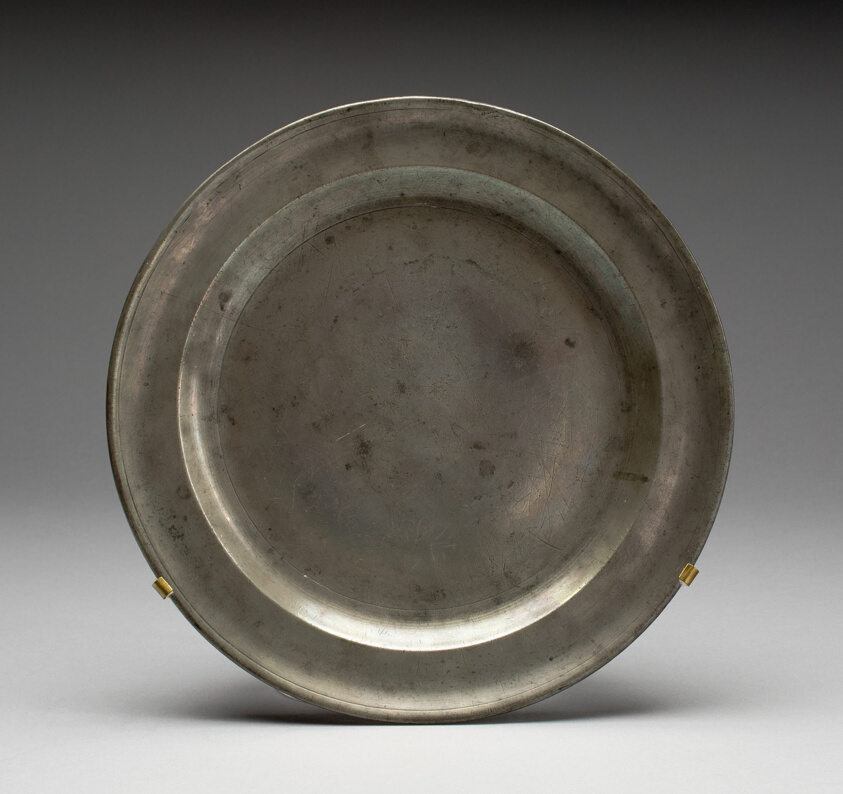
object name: Decorative Arts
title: Charger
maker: Artist unknown (American, 19th century); Boston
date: 1800–50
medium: Pewter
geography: Boston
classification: plate (general, dish); metalwork; american decorative arts; american arts; decorative arts